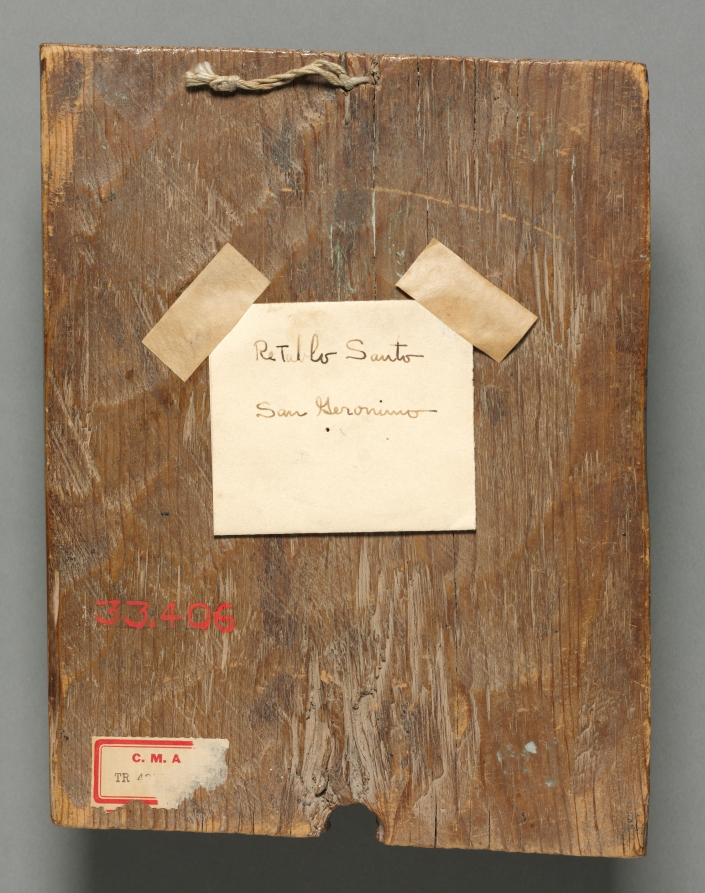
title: San Geronimo: santo de retablo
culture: America, New Mexico, 17th-18th century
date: 1600s-1700s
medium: oil on wood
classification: Painting